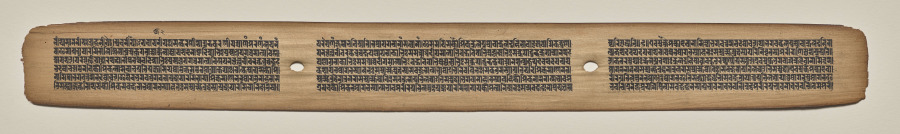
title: Text, Folio 20 (recto), from a Manuscript of the Perfection of Wisdom in Eight Thousand Lines (Ashtasahasrika Prajnaparamita-sutra)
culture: Eastern India, Bihar, Vikramashila Monastery. Painting: Nepal, Kathmandu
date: Sunday, September 14, 1119 (year 239 of the Newar Samvat in the month of Ashvina)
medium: gum tempera and ink on palm leaves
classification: Painting